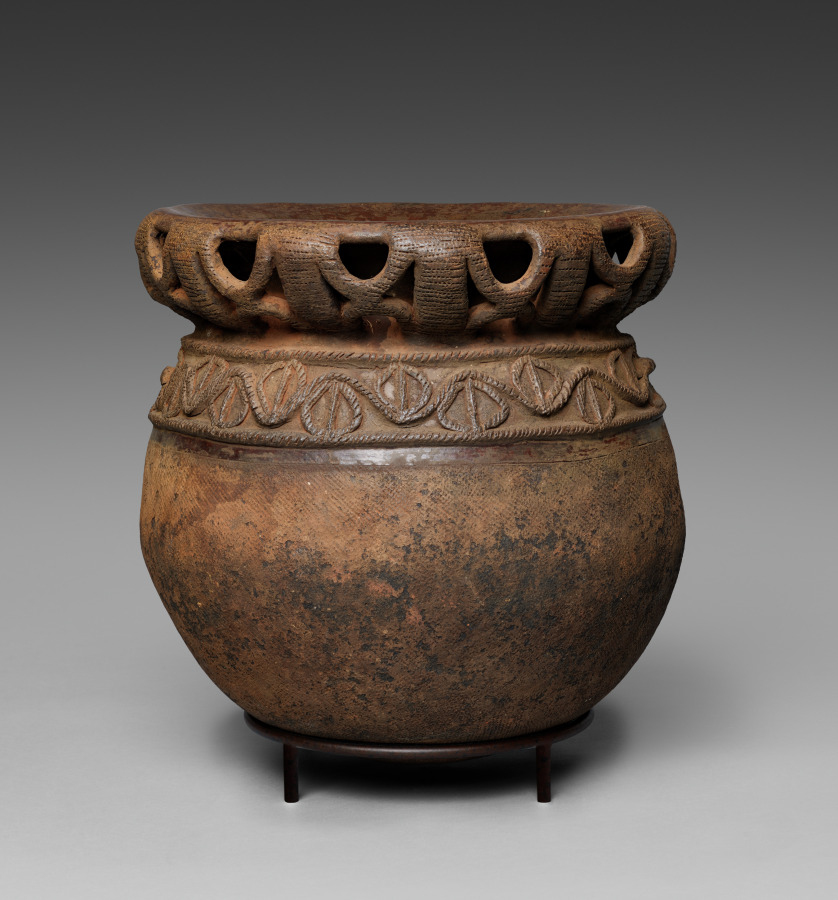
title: Palm Wine Vessel (kuh mendu)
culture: Probably Babessi or Bamessing, Cameroon, Cameroon Grassfields-style pottery, unknown female ceramicist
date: 1900s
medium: Terracotta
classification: Vessels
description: Made by a female potter nearly a century ago, this palm wine vessel represents past and present cultural practices in the Cameroon Grassfields (northwest and western Cameroon). Women in the pottery-producing centers of Babessi and Bamessing hand-built these vessels. Their process alludes to pregnancy, labor, and delivery. Passing knowledge from mother to daughter since at least the 1700s, making pottery is a female economic, social, and artistic contribution. Yet many motifs refer to royal or male power, such as the lizards on this vessel. Elegant palm wine vessels like this were appropriate for ritual and hospitality in Cameroon Grassfields royal courts.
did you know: Serving and sharing palm wine in decorated vessels like this is part of a larger food culture in the Cameroon Grassfields kingdoms that centers on ritual, hospitality, status, and diplomacy.